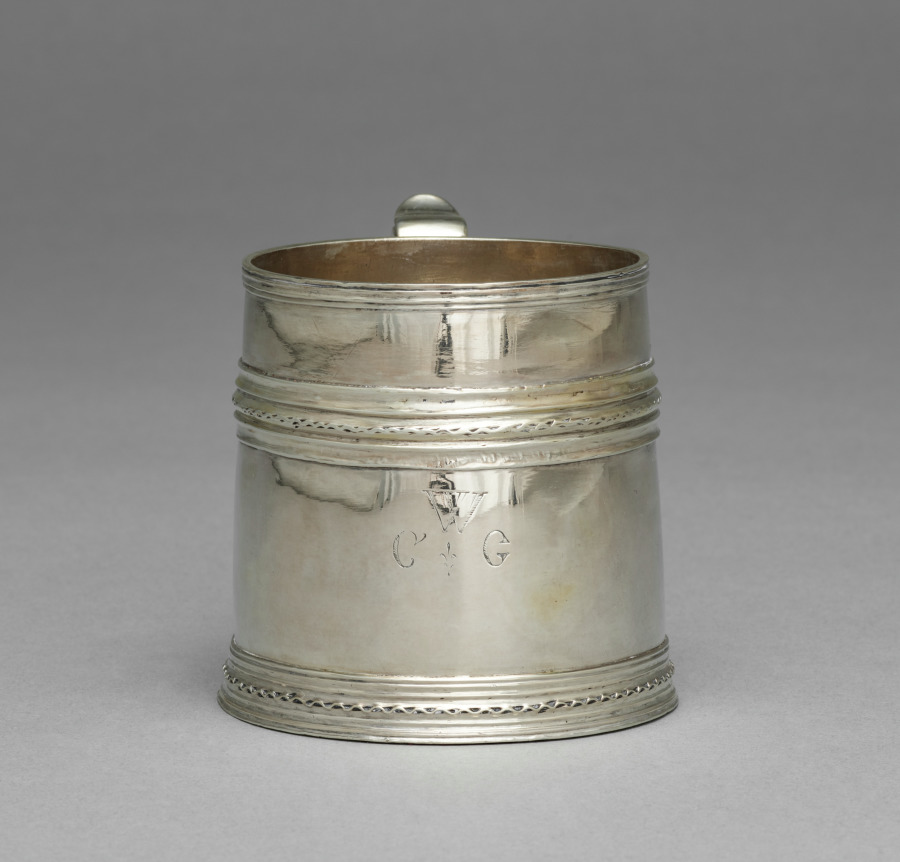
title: Cup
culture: America, New York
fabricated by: Benjamin Wynkoop (American, 1675–1728)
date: 1700–1725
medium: silver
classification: Silver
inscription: engraved: "W" over "C*G" in block letters on front of cup, opposite handle.